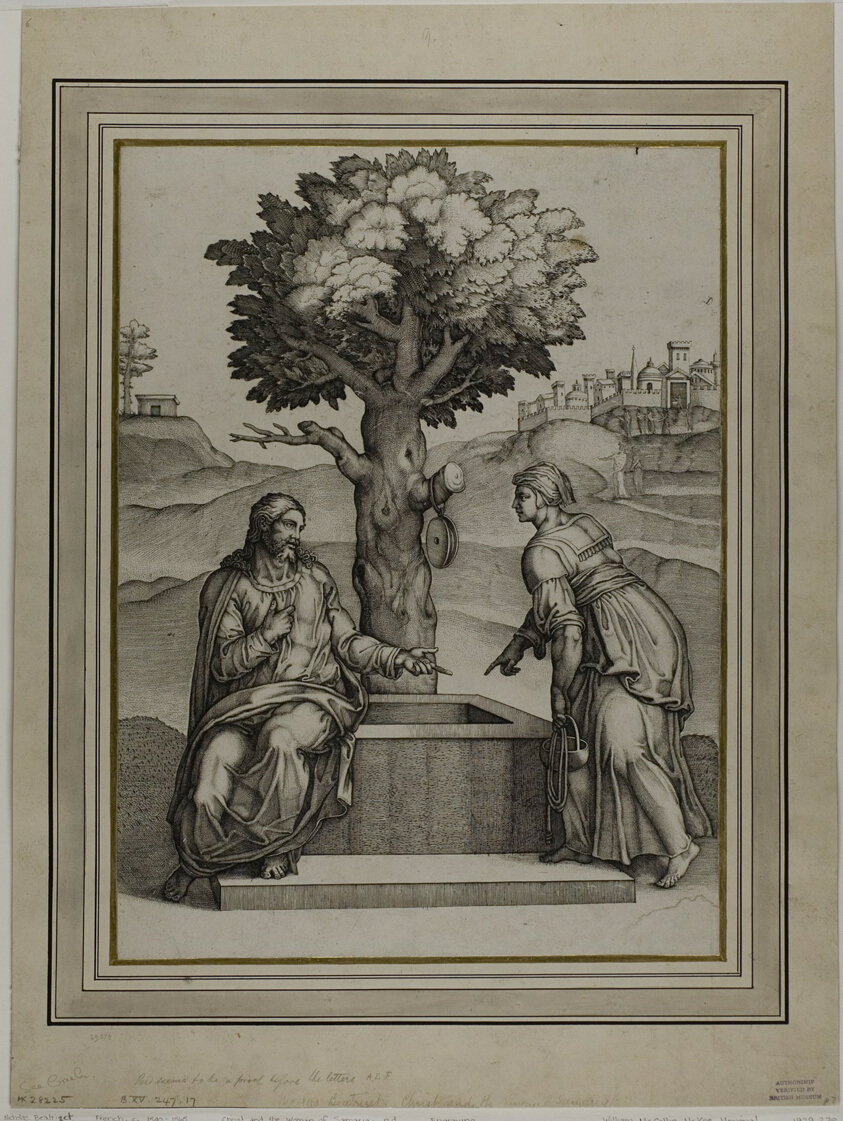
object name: Print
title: Christ and the Woman of Samaria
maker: Nicolas Beatrizet (French, 1515-after 1565); after Michelangelo Buonarroti (Italian, 1475-1564)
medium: Engraving on paper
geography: France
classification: engraving; print; prints and drawing